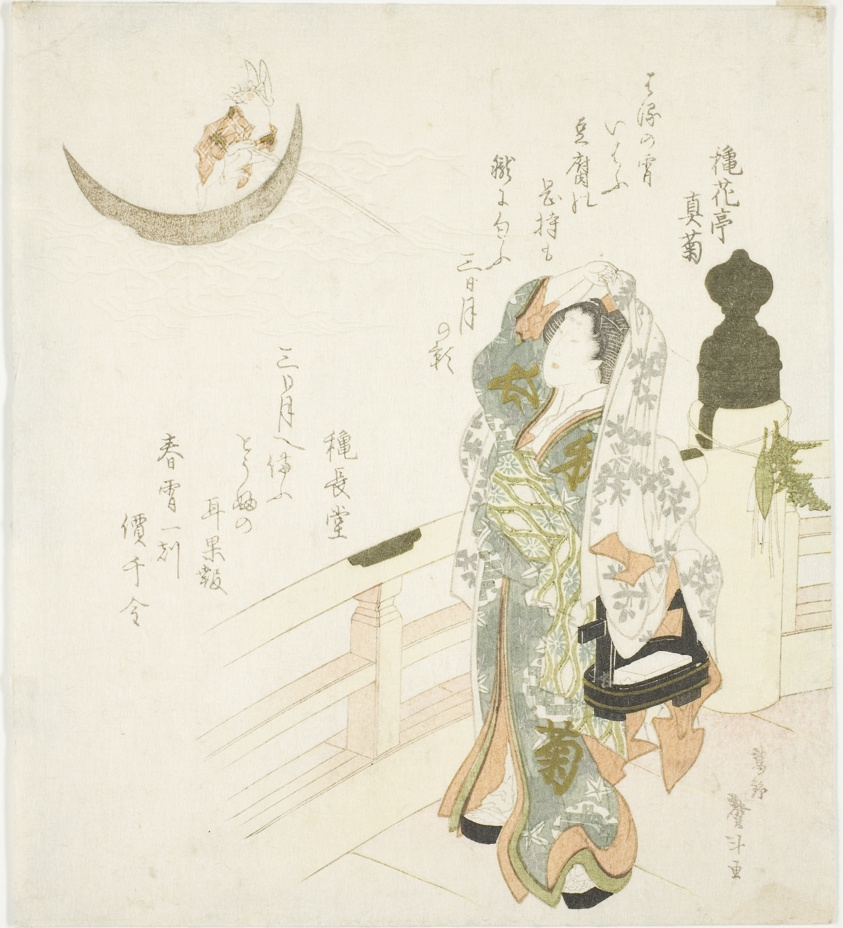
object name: Print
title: Woman on the bridge watching the moon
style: Japanese (culture or style)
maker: Katsushika Taito II (Japanese, active c. 1810-53)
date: 1831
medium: Color woodblock print; shikishiban, surimono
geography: Japan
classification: woodblock print; print; asian art